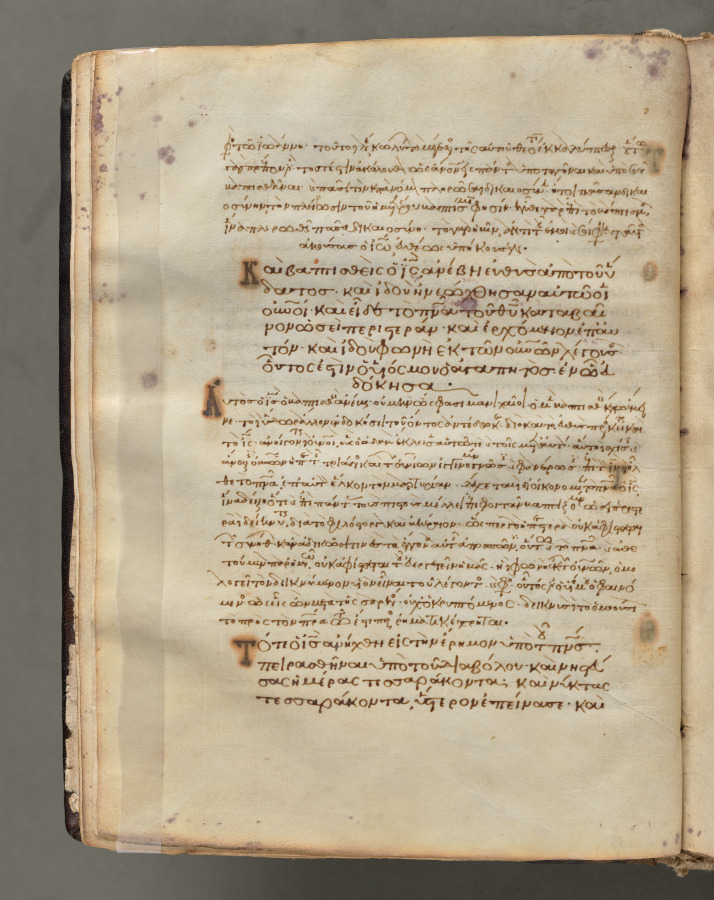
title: Text, folio 14 (verso), from a Gospel Book with Commentaries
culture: Byzantium, Constantinople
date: c. 1000–1100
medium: ink, tempera, and gold on vellum; leather binding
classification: Bound Volume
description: Each of the four gospels in this book opens on a page with brilliantly illuminated borders depicting the author of the text as well as birds-principally peacocks, symbols of the immortality of the soul-and fountains, representing the fountain of life and the salvation of the soul. This volume consists of 428 leaves with texts in Greek. Its level of sophistication suggests that it was probably written and decorated in a monastery in Constantinople.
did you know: Gospel Books were carried in procession through Byzantine churches.